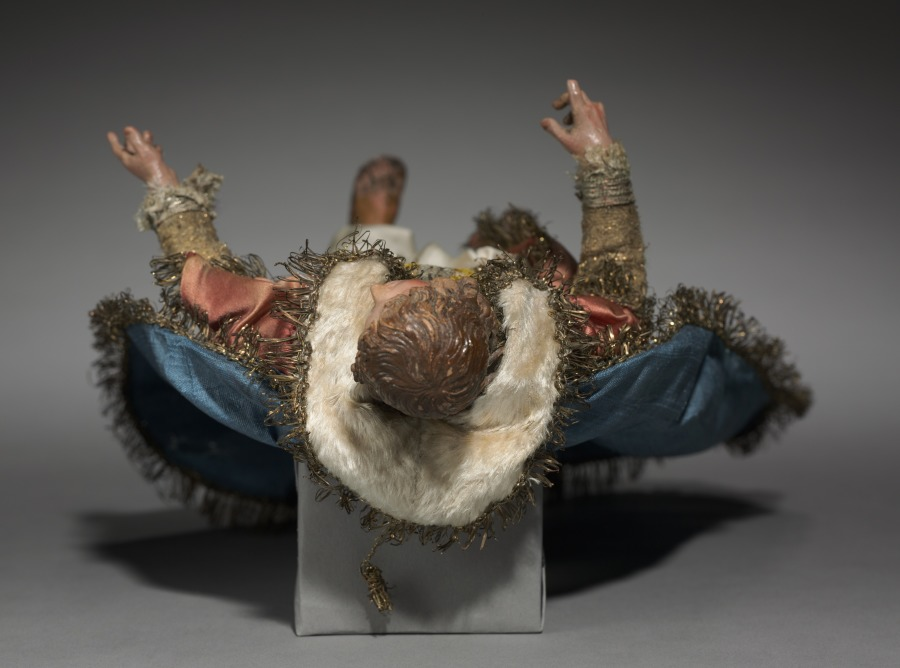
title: Figure from a Crèche: Youthful Magus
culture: Italy, Naples, late 18th-early 19th century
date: 1780–1830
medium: painted wood and terracotta with various textiles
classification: Sculpture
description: The practice of creating scenes of the Nativity for the home dates from the early 1700s in Italy, where people began to set up doll-like figures of about a foot or less in height. The custom was particularly popular in Naples around 1800, where crèche scenes (crèche means cradle, or crib) included many figures, whose heads and hands of painted terracotta, stuffed cloth bodies, and clothing adapted from contemporary local costumes gave them an amazingly realistic character. Representations of the birth of Jesus can be traced to the first few centuries of Christianity. Both living creatures and sculptural depictions of them were used from early times. By the late middle ages it was customary to create life-size figures of wood or stone, naturalistically painted, to represent the characters who participated in the events of Jesus's early life. These sculptures were then arranged in scenes illustrating one or both of the most important of these events, the Adoration of the Shepherds and the Adoration of the Magi-the three kings from the East who came to pay homage to the Christ child. Used in churches, these large figures were especially popular in Italy, Central Europe, Spain, and Portugal.